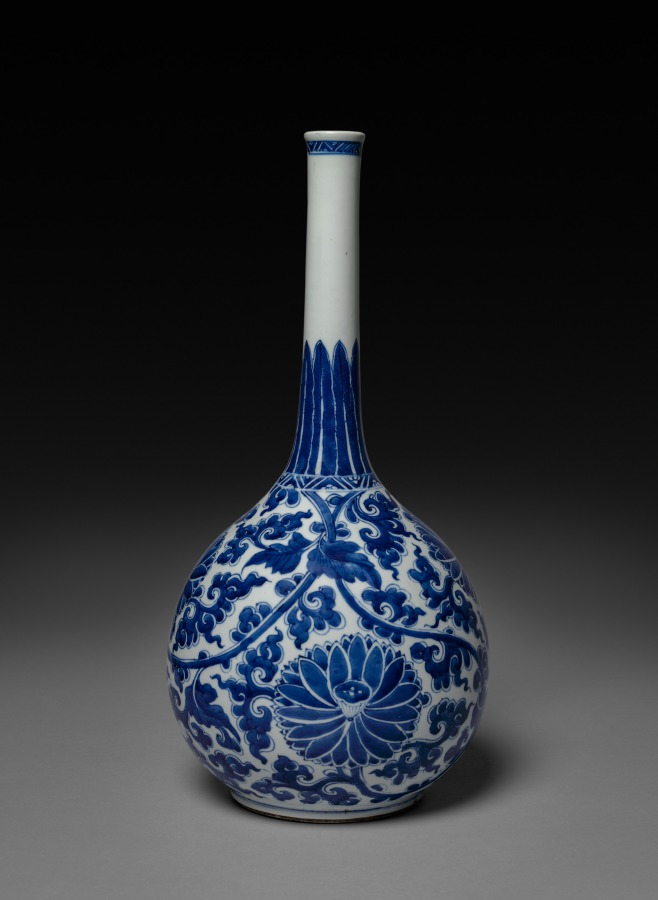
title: Bottle-shaped Vase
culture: China, Qing dynasty (1644-1911), Kangxi reign (1662-1722)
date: 1662–1722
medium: porcelain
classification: Ceramic